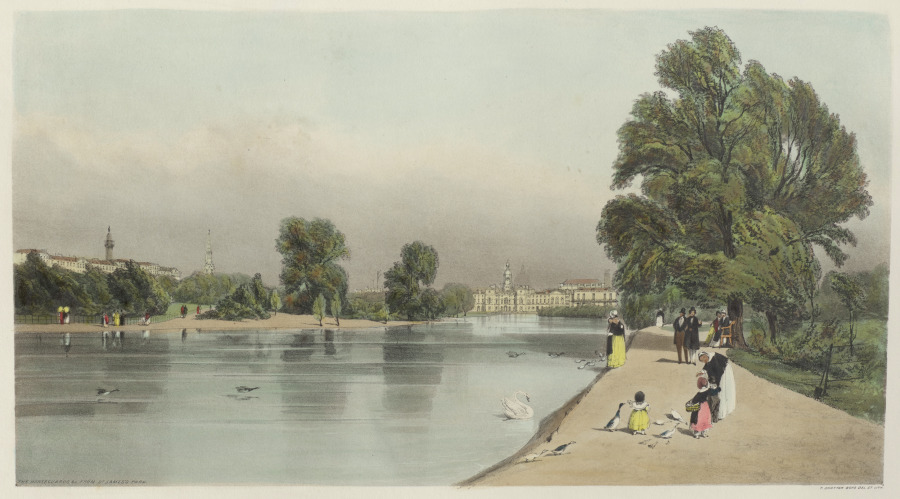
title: London As It Is: The Horse-Guards, from St. James's Park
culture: England, 19th century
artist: Thomas Shotter Boys (British, 1803–1874)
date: 1842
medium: lithograph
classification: Bound Volume